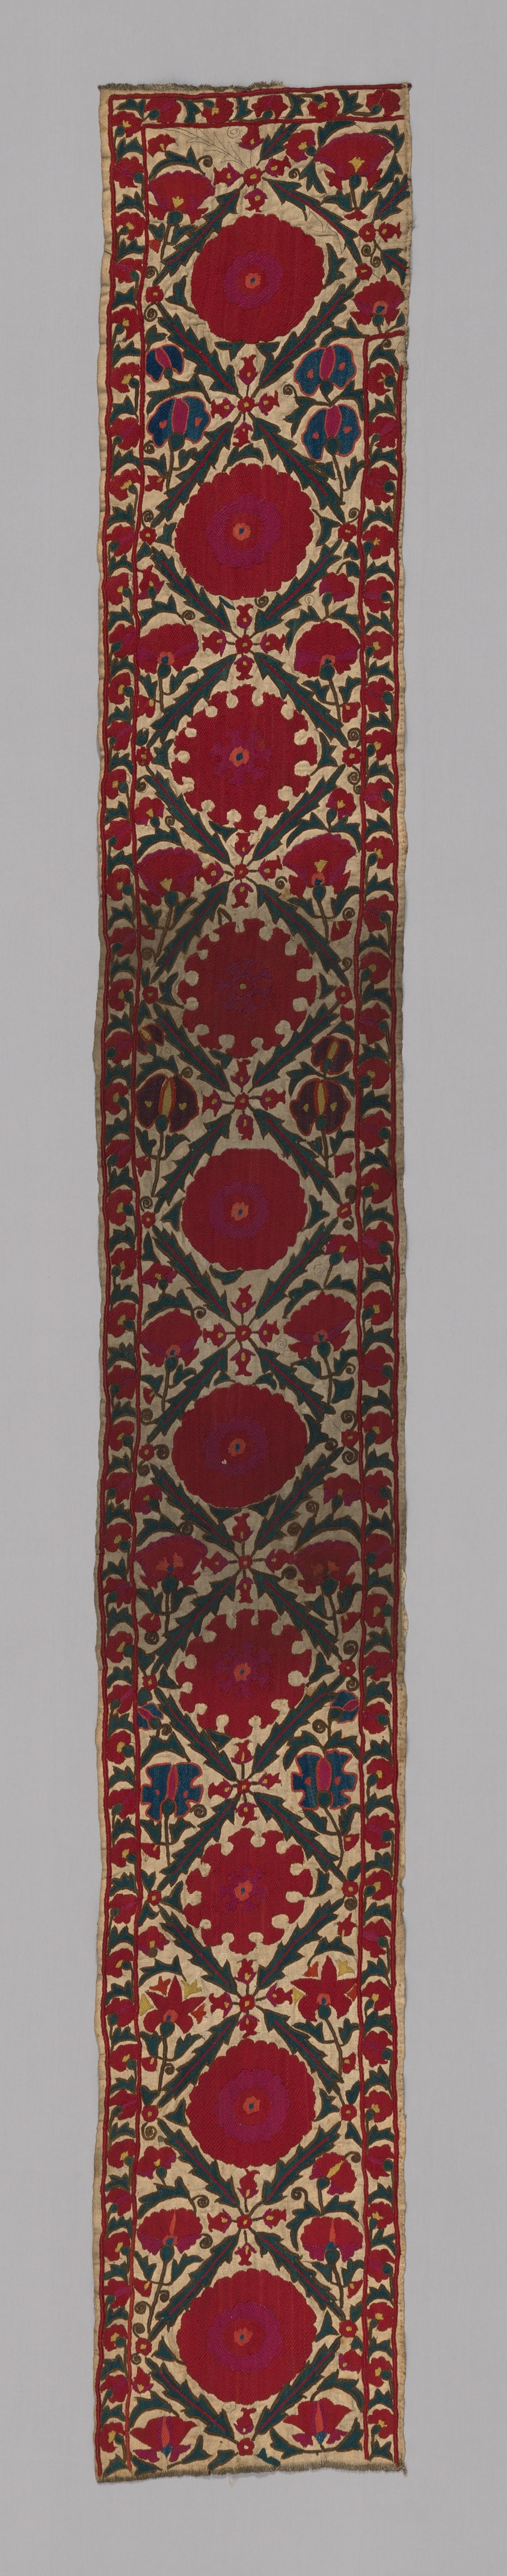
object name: Textile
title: Border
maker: Bukhara, Uzbekistan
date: 19th century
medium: Linen embroidered in multicolor silk.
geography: Uzbekistan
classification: textile; needlework (visual works)